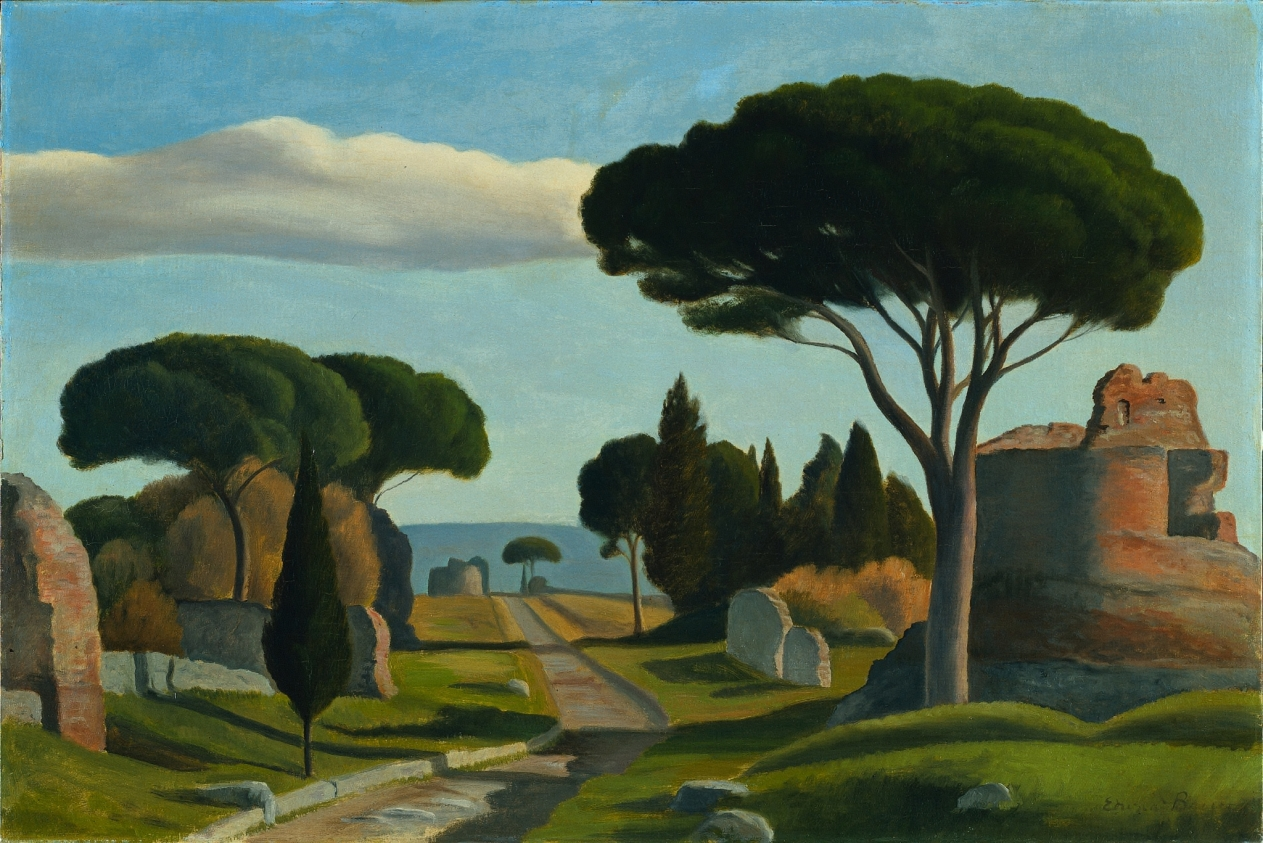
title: The Appian Way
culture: America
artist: Edward Bruce (American, 1879–1943)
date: c. 1929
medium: oil on canvas on panel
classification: Painting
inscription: signed lower right: Edward Bruce